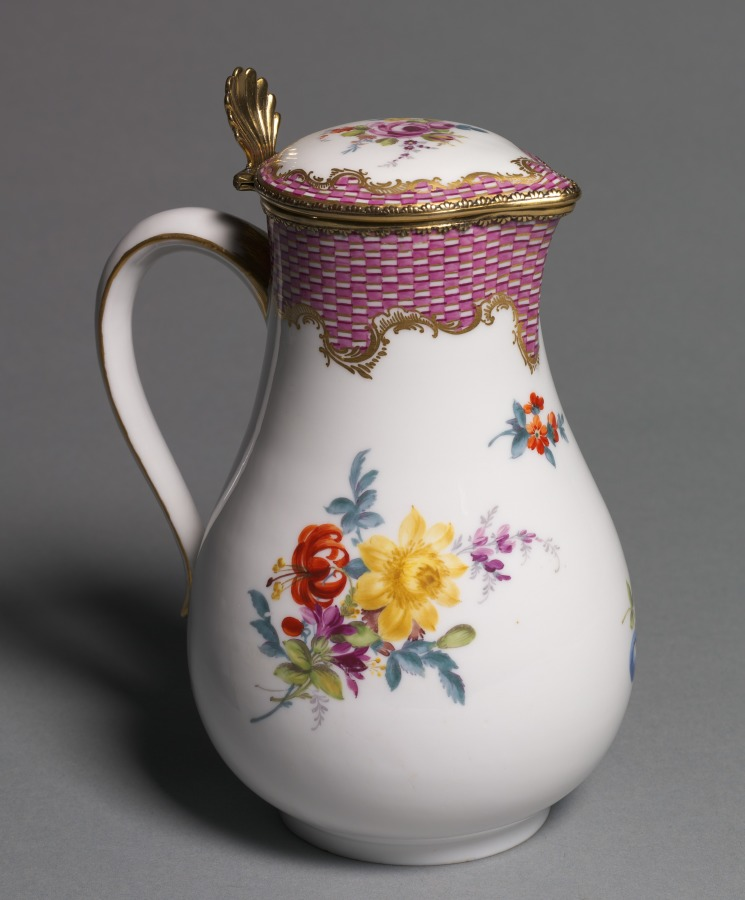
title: Covered Milk Jug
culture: Germany, Meissen, 18th century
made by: Meissen Porcelain Factory (German, est. c. 1710)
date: c. 1765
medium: porcelain with gilt metal mounts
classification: Ceramic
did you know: Milk jugs with lids or covers usually held warm milk for coffee or tea.